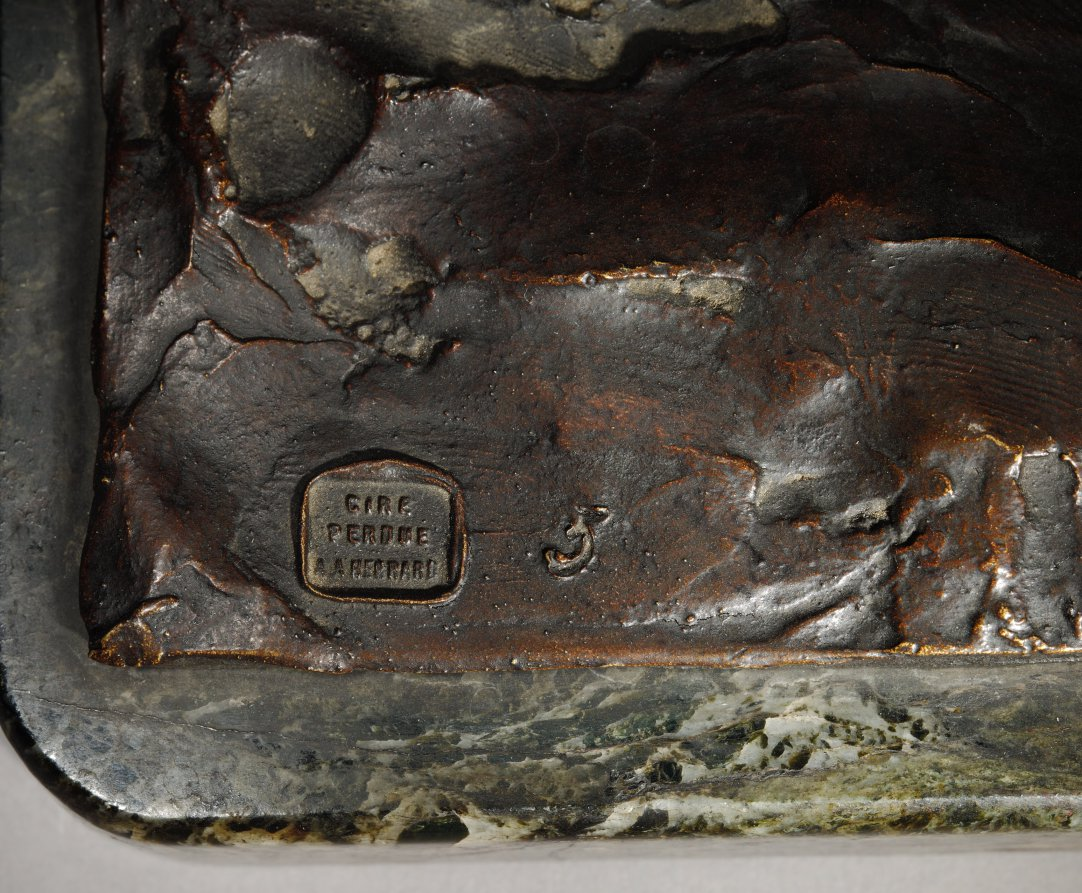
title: Walking Panther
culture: Italy, active in France, early 20th Century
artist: Rembrandt Bugatti (Italian, 1884–1916)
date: 1903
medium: bronze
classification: Sculpture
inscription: signed: R. Bugatti, stamped A. A. Hebrard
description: Panthers were among the first wild animals depicted by Rembrandt Bugatti after his encounter with them in the French national zoo, at the Jardin des Plantes in Paris.